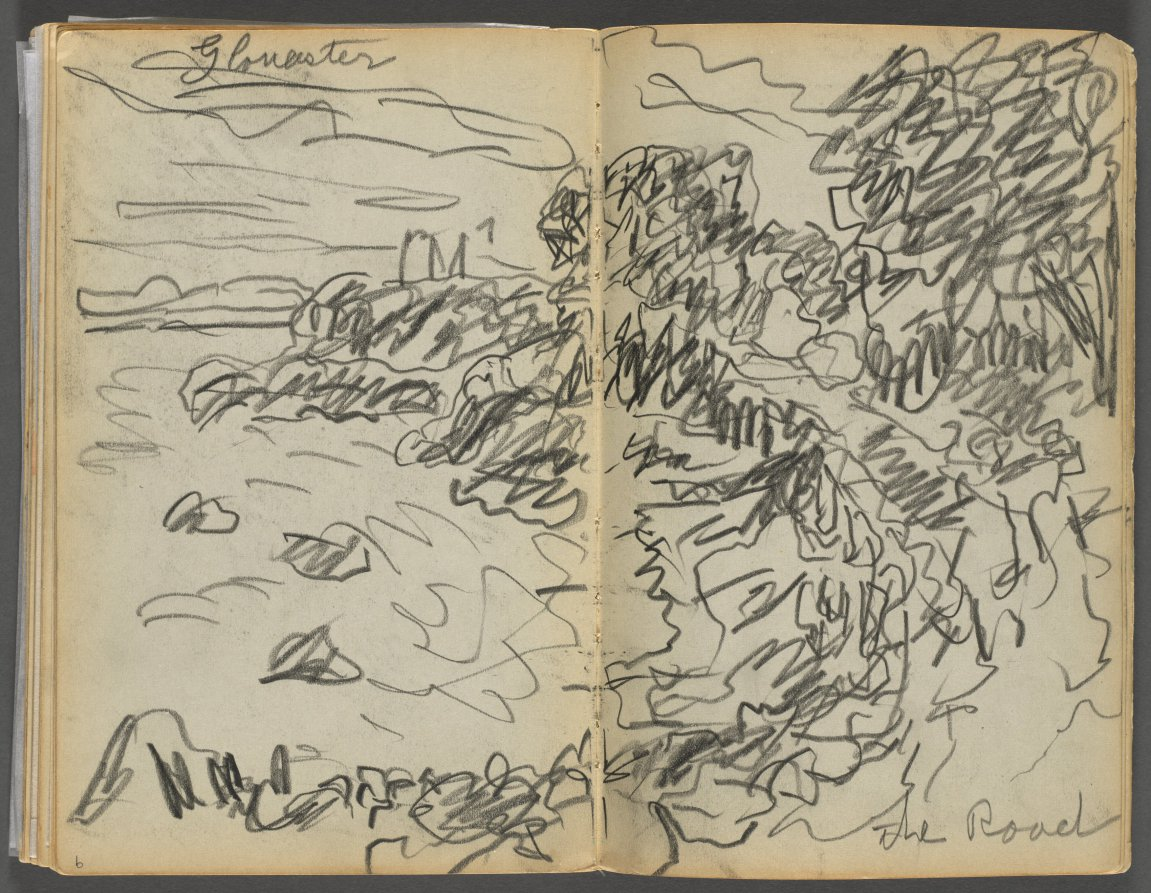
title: Sketchbook- The Granite Shore Hotel, Rockport, page 008 & 9: "Gloucester- The Road"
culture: America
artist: Maurice Prendergast (American, born Newfoundland [now Canada], 1858–1924)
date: 1905–10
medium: graphite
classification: Bound Volume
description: This sketchbook contains 72 pages of pencil drawings and 9 watercolors of Cape Ann. On the inside of the cover Prendergast wrote the address of the Granite Shore Hotel in Rockport, Massachusetts.